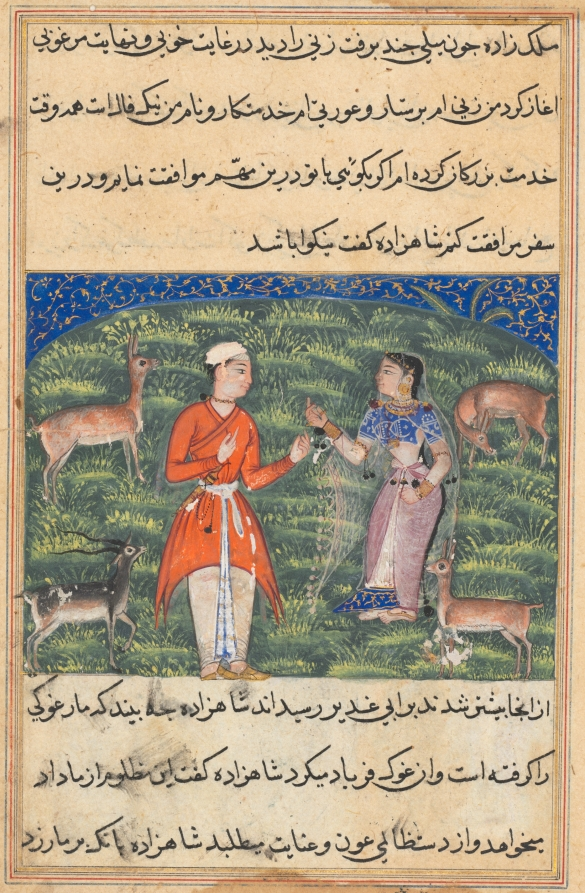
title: Nikfal, the fortune of the prince in the form of a woman, offers to accompany him, from a Tuti-nama (Tales of a Parrot): Eighteenth Night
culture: Mughal India, court of Akbar (reigned 1556–1605)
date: c. 1560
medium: gum tempera, ink, and gold on paper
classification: Painting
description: The good fortune of the dervish that the prince purchased with his ring appeared to him in the form of a beautiful woman named Nikfal, meaning “Good Fortune.” The pair converse amiably in a grassy meadow full of deer under a lapis lazuli–blue sky with gold arabesque motifs. She wears Indian garments, while the prince is dressed as a Mughal in Central Asian garments. The story is said to take place in Zabulistan, in western Afghanistan.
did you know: The animals in the background indicate that the scene is set in the wilderness.